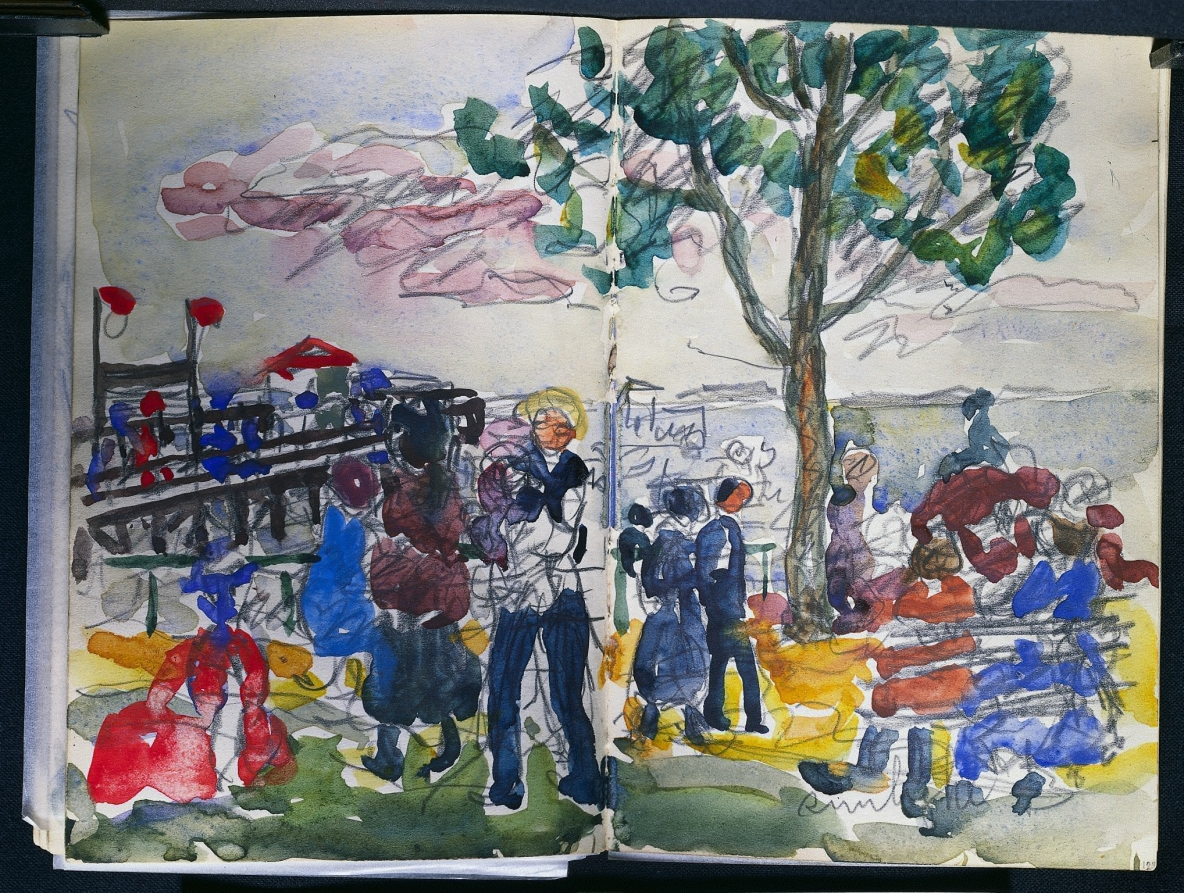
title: Sketchbook, The Dells, N° 127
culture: America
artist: Maurice Prendergast (American, born Newfoundland [now Canada], 1858–1924)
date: c. 1919–1921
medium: graphite and watercolor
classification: Bound Volume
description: This sketchbook contains 59 pages of graphite drawings and 16 watercolors made at various locations on Cape Ann, Massachusetts.